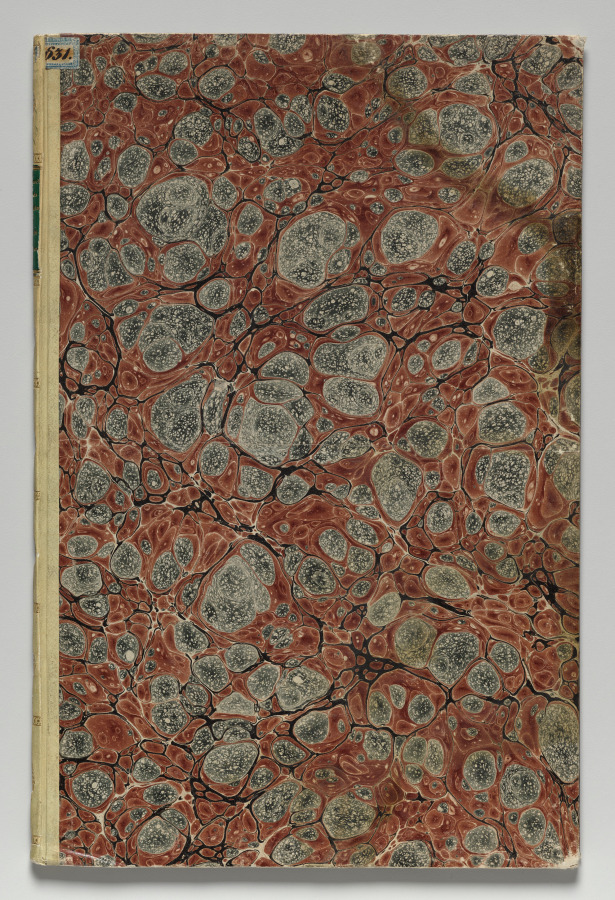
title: Germany's Famous Authors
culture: Germany, 19th century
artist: Gustav Karl Friedrich Lüderitz (German, 1803–1884)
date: 1824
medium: portfolio of 6 lithographs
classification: Print